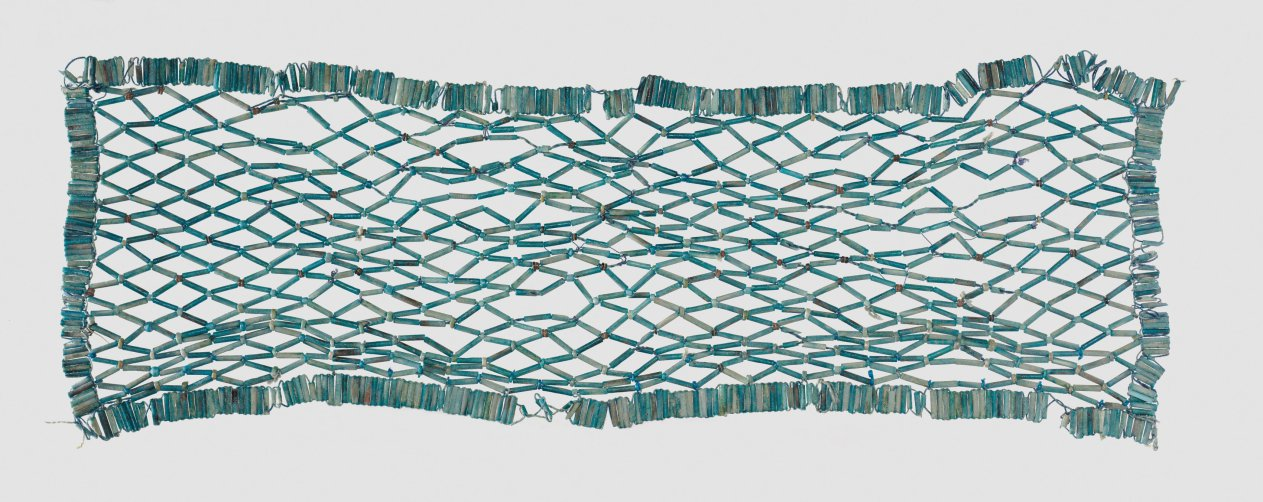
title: Faience Bead Net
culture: Egypt, Late period (715–332 BCE)–Greco-Roman period (332 BCE–395 CE), Ptolemaic dynasty (305–30 BCE)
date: 664–30 BCE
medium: faience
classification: Funerary Equipment